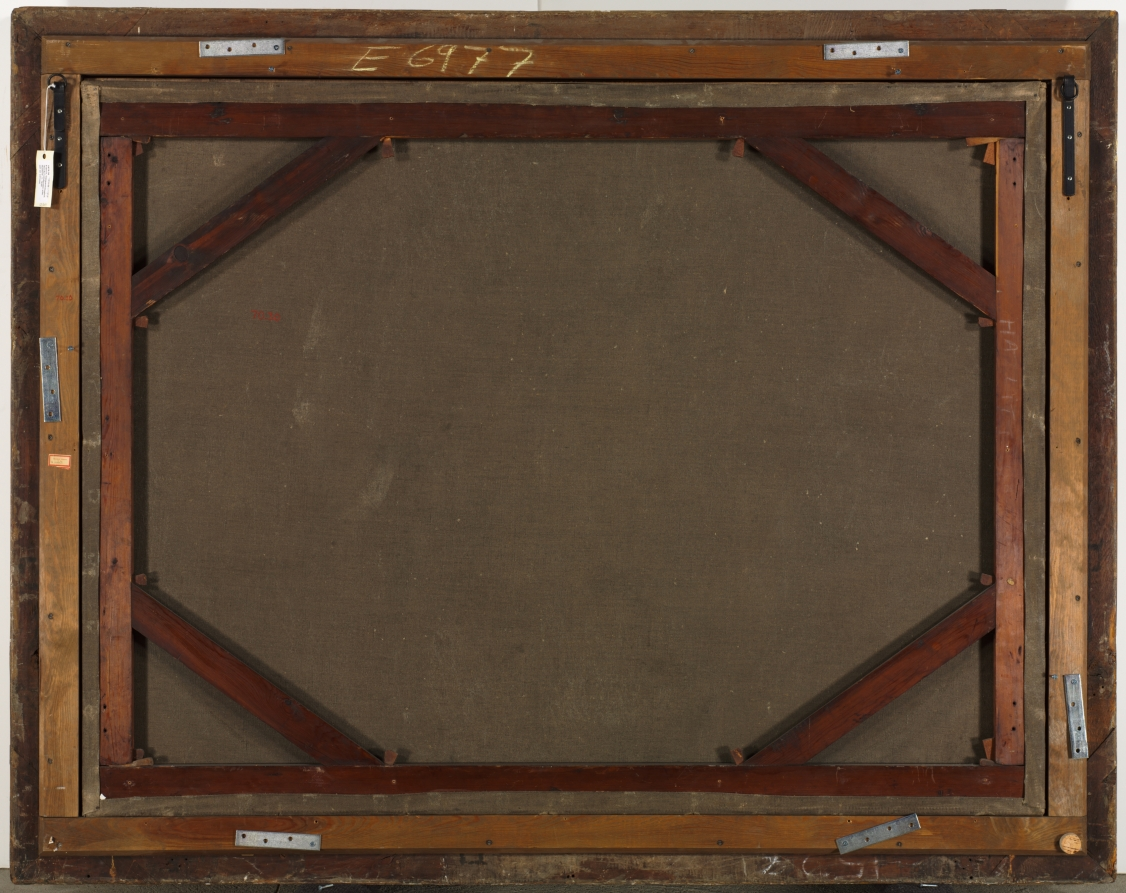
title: Rocky Landscape with Hunters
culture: France, 17th century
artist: Gaspard Dughet (French, 1615–1675)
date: c. 1635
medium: oil on canvas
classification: Painting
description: Dughet spent his whole career in Rome. At the age of fifteen he entered the studio of Nicolas Poussin (1593/94-1665), who married his sister. Dughet concentrated exclusively on landscapes, preferring a rugged type of scenery, widely imitated well into the 18th century.